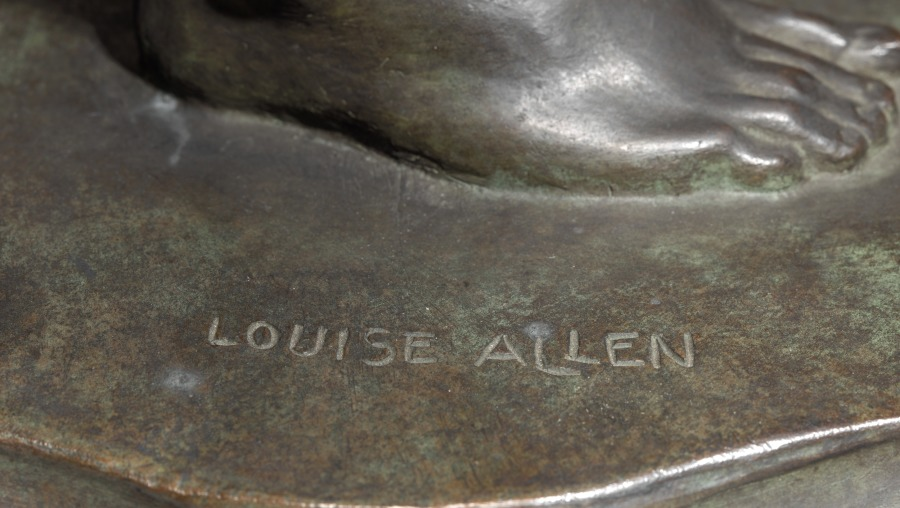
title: Pippa Passes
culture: America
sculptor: Louise Allen (American, 1880–1953)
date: c. 1916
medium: bronze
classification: Sculpture